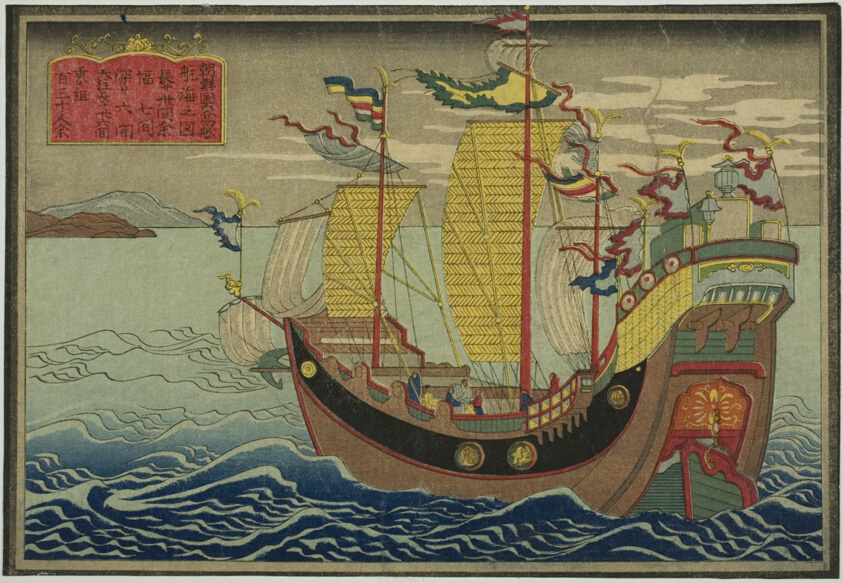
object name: Print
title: Korean Ship, from the set of eight Pictures of Foreign Ships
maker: Unknown Artist (Japanese, date unknown)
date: 1840s–1850s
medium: Color woodblock print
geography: Japan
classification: woodblock print; print; asian art